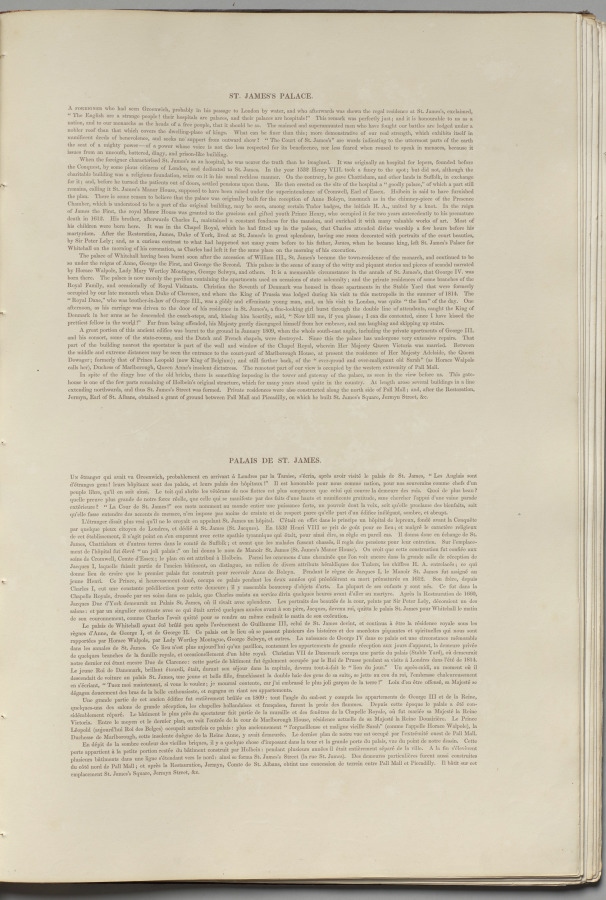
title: London As It Is: North Front to St. James's Palace, from Cleveland Row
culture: England, 19th century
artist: Thomas Shotter Boys (British, 1803–1874)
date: 1842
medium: lithograph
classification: Bound Volume